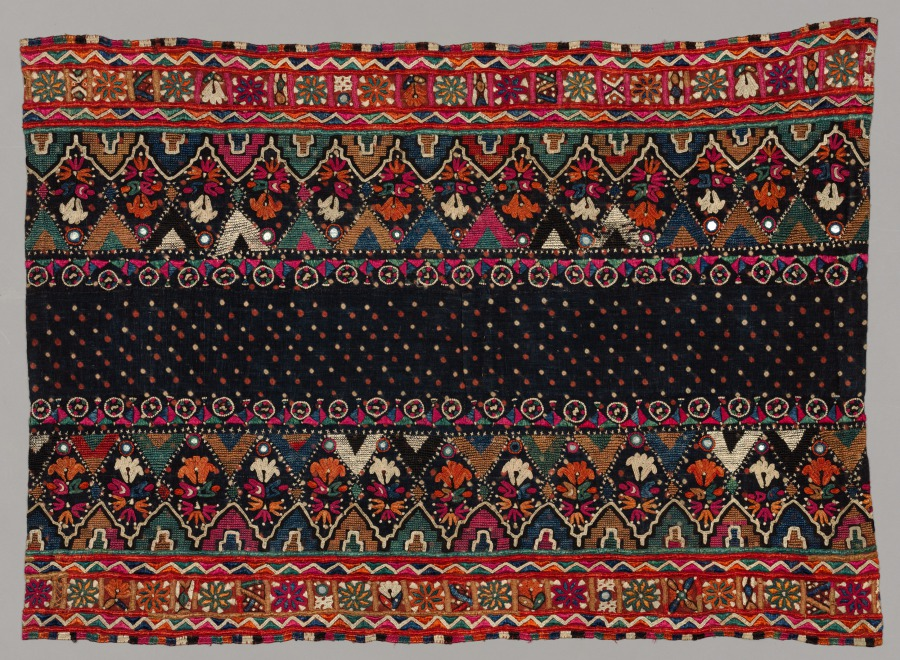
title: Shawl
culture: India, Kathiawar, 19th century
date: 1800s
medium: embroidery: silk on cotton tabby ground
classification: Embroidery